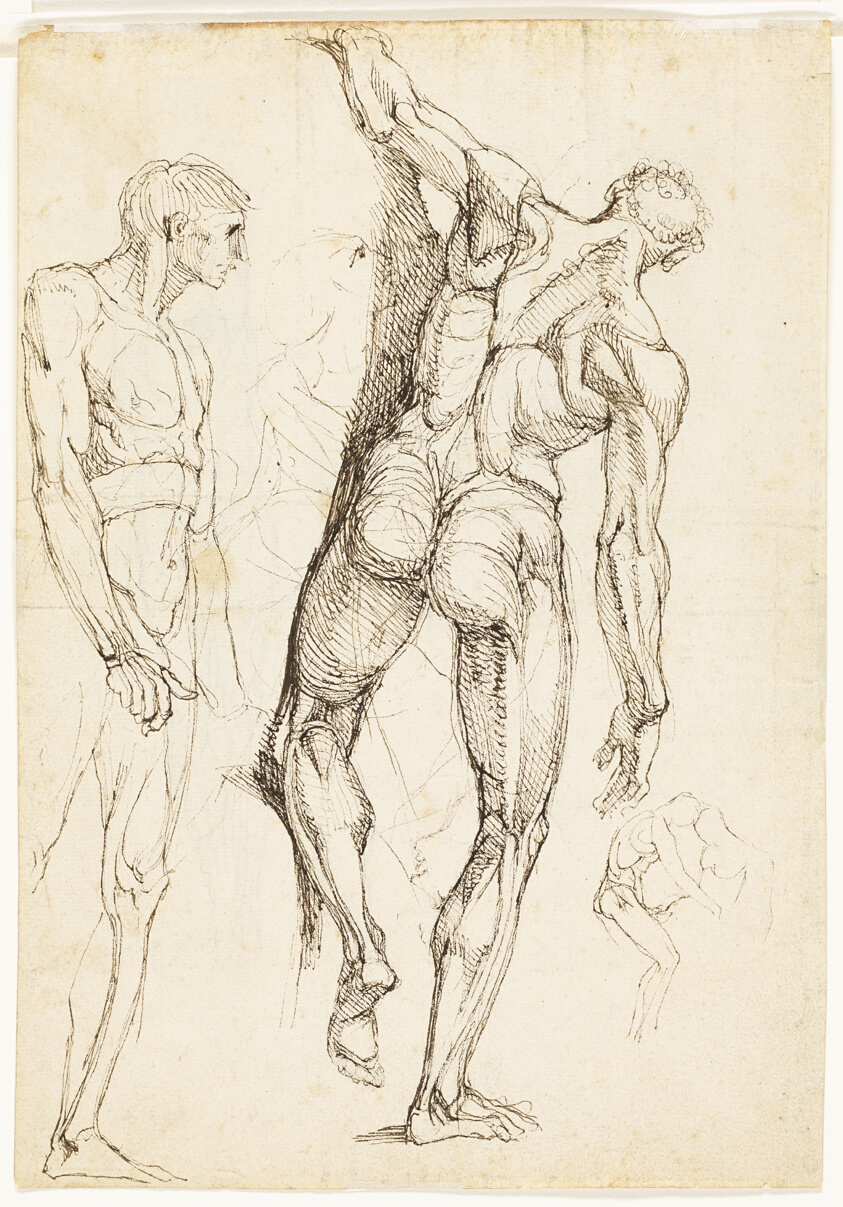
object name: Drawing and Watercolor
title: Figure Studies (recto and verso)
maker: Henry Fuseli (Swiss, active in England, 1741-1825)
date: c. 1800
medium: Pen and brown ink (recto and verso) on cream laid paper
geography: England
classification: pen and ink drawings; drawings (visual works); prints and drawing; paper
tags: zigzags